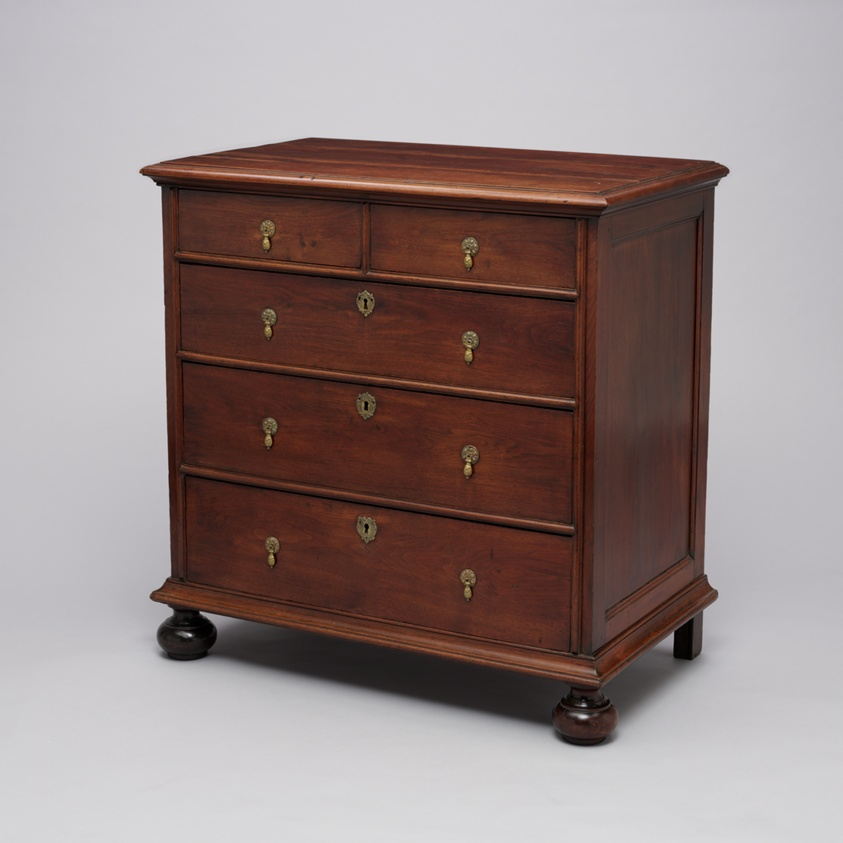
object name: Furniture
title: Chest of Drawers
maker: Artist unknown (American, 18th century); Pennsylvania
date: 1700–30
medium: Walnut, tulipwood, and pine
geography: Pennsylvania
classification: case furniture; furniture; american decorative arts; american arts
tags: furniture